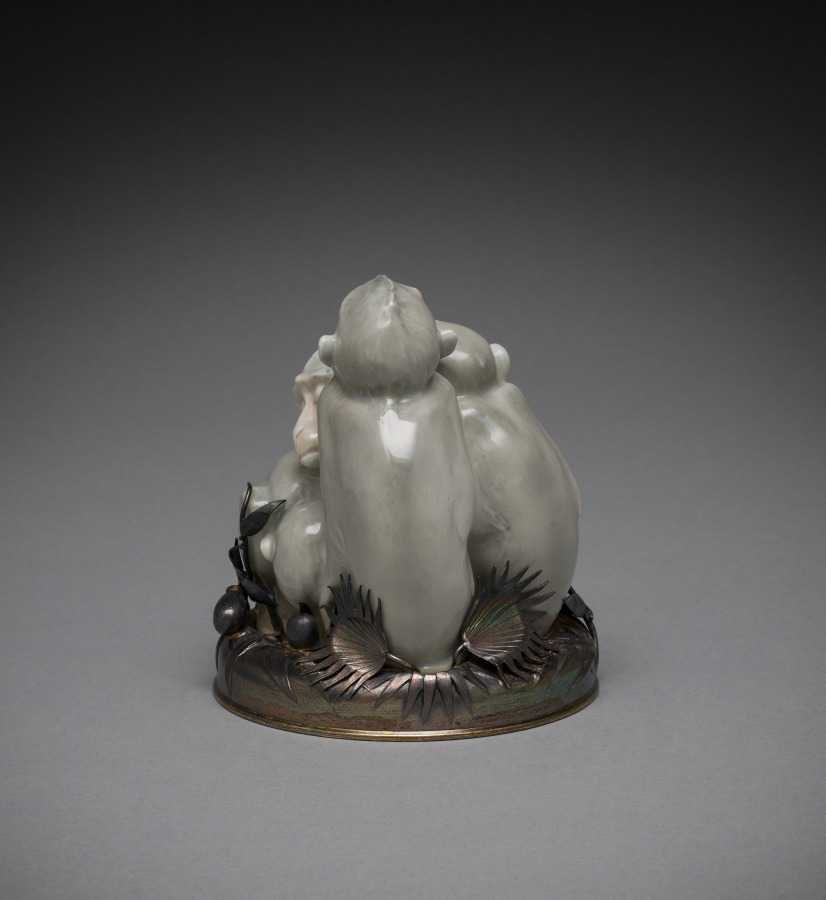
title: Monkey Figure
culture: Sweden, 19th century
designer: Ingeborg Plockross-Iminger (Danish, 1872–1962)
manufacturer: Bing & Grøndahl (Danish, est. 1853)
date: c. 1850–1900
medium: porcelain, silver-gilt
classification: Sculpture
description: This figure featuring three monkeys was designed by the Danish ceramicist Ingeborg Plockross-Iminger. The figure is displayed with a French silver mount that references Japonisme and Art Nouveau styles that were popular at the end of the 1800s and experienced a resurgence in the 1920s because of increased importation of Japanese goods to the West.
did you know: This ceramic figure usually stands alone, without a silver mounting.